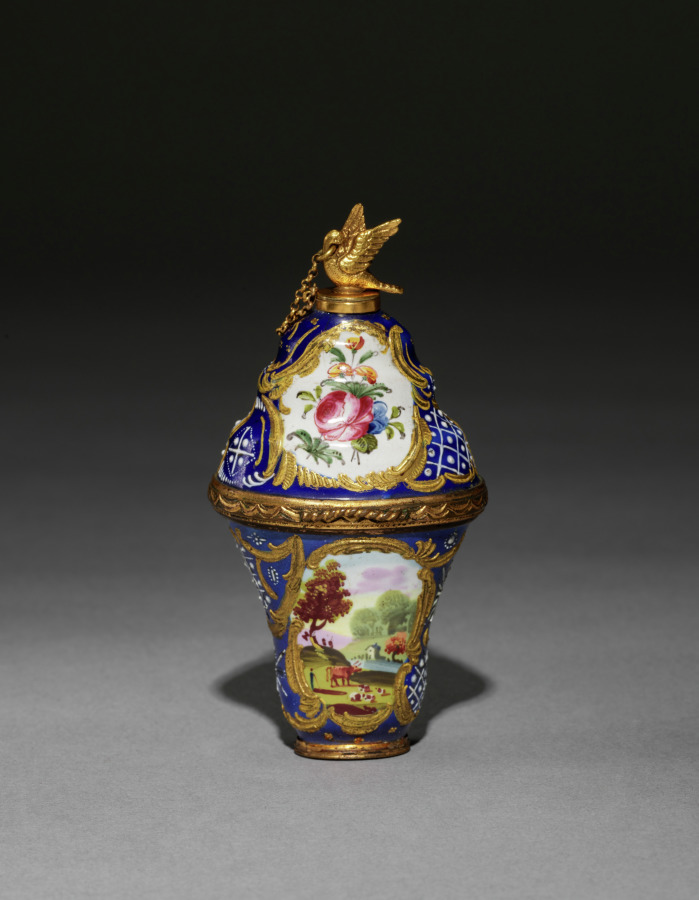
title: Scent Bottle and Box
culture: England, Staffordshire, 18th century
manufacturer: Staffordshire Factory (British)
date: 1750–1775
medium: enamel on copper with metal mounts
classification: Miscellaneous